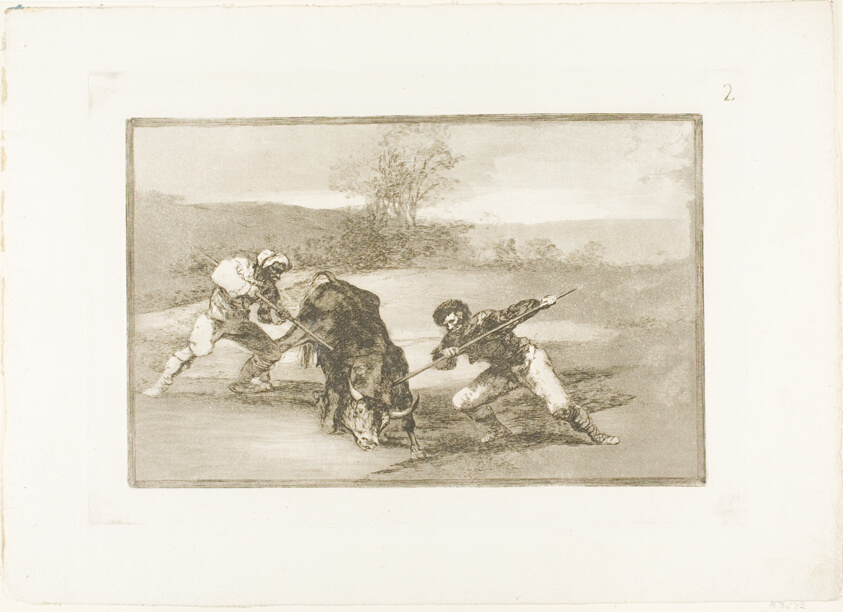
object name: Print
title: Another way of hunting on foot, plate two from The Art of Bullfighting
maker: Francisco José de Goya y Lucientes (Spanish, 1746-1828)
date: 1814/16, published 1816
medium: Etching, burnished aquatint, drypoint and burin on ivory laid paper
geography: Spain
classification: etching; print; prints and drawing